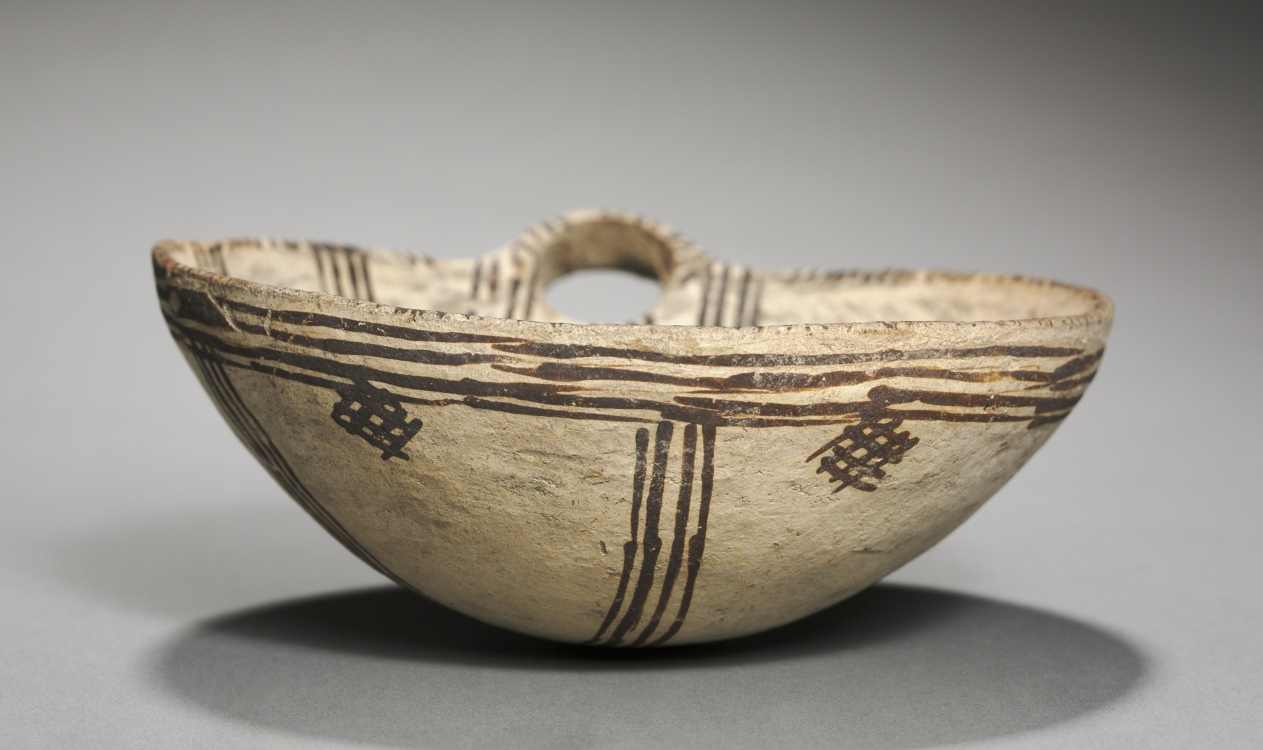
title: One-Handled Bowl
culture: Cyprus, late Cypriot II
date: c. 1450–1200 BCE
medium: white slip ware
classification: Ceramic